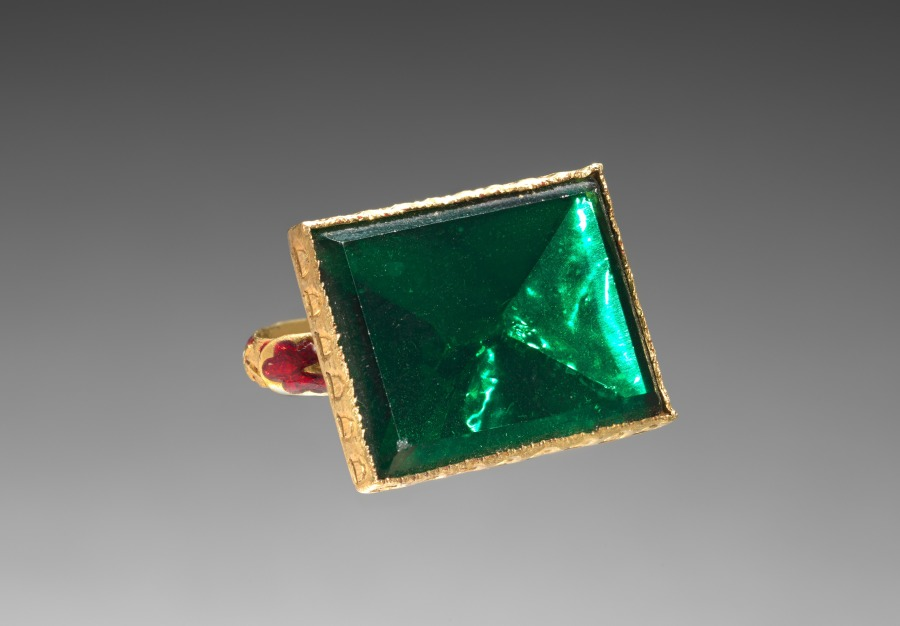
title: Ring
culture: India, Mughal, 18th century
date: 1700s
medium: Gold, colored glass, and enamel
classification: Jewelry